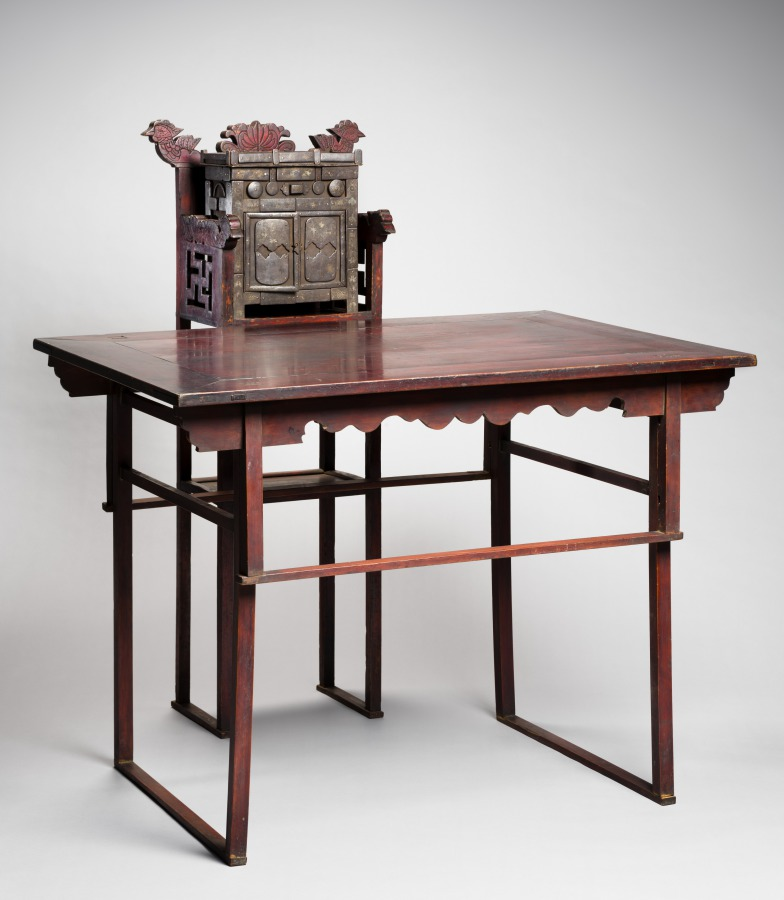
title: Spirit House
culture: Korea, Joseon dynasty (1392–1910)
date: late 1800s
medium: iron inlaid with silver and copper decoration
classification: Metalwork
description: This table, chair, and spirit house form a partial recreation of a memorial altar from the Joseon period. The spirit house and chair both include a number of auspicious symbols, including lotuses, conch shells, and chakra wheels. The spirit house would have been placed on the altar chair, and offerings would have been set out on the table for the memorial service. In ancestor veneration rituals, deceased parents or ancestors are sanctified as spirits who are believed to oversee their descendents. Three times a year, once at the lunar new year, once at the person’s death date, and once at the time of the mid-autumn festival, food would be placed on the table for the ancestors, including fruits, rice, meat, and rice wine. During these ceremonies the worshippers’ attitude was as reverential toward the objects meant to embody the ancestors’ spirits as that toward a living parent.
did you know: The belief in two types of souls, the spiritual and the corporeal, embodied the core concept of ancestor worship in traditional China and Korea. While the corporeal soul is believed to reside in the tomb, the spiritual soul, in the spirit house like this example, guards his or her decedents.